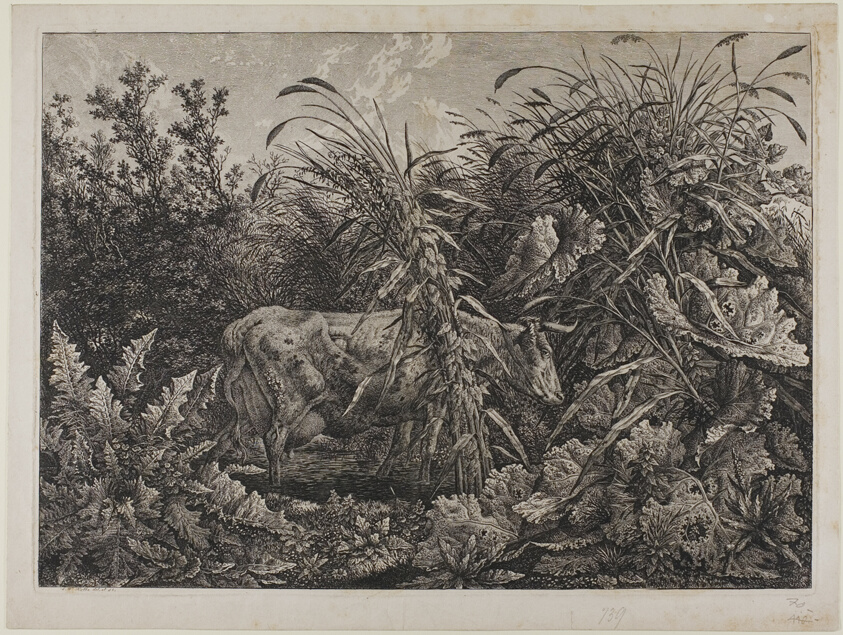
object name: Print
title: Cow in a Stream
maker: Carl Wilhelm Kolbe, the elder (German, 1759-1835)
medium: Etching on paper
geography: Germany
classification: etching; print; prints and drawing